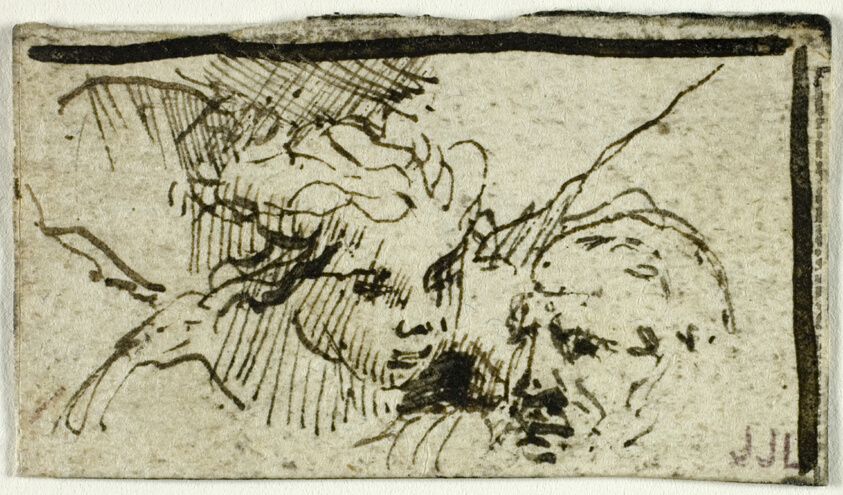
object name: Drawing and Watercolor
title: Rembrandt's Sacrifice of Issac - Heads of Abraham and Angel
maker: Unknown Artist; Italian, 17th century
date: after 1655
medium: Pen and brown ink, on ivory laid paper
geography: Italy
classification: pen and ink drawings; drawings (visual works); prints and drawing